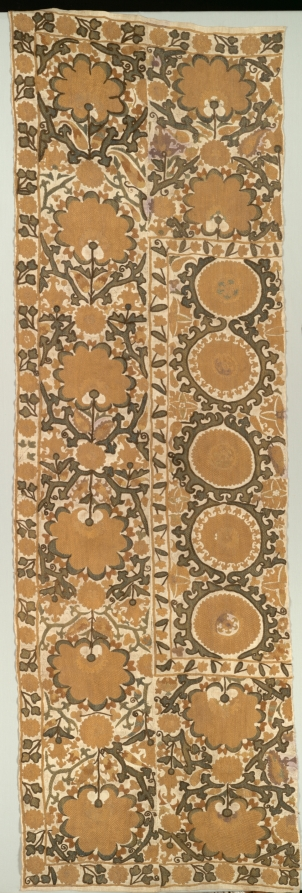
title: Part of a Curtain (Two Widths)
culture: Uzbekistan, Bukhara, 19th century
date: 19th century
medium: silk embroidery on cotton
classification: Embroidery